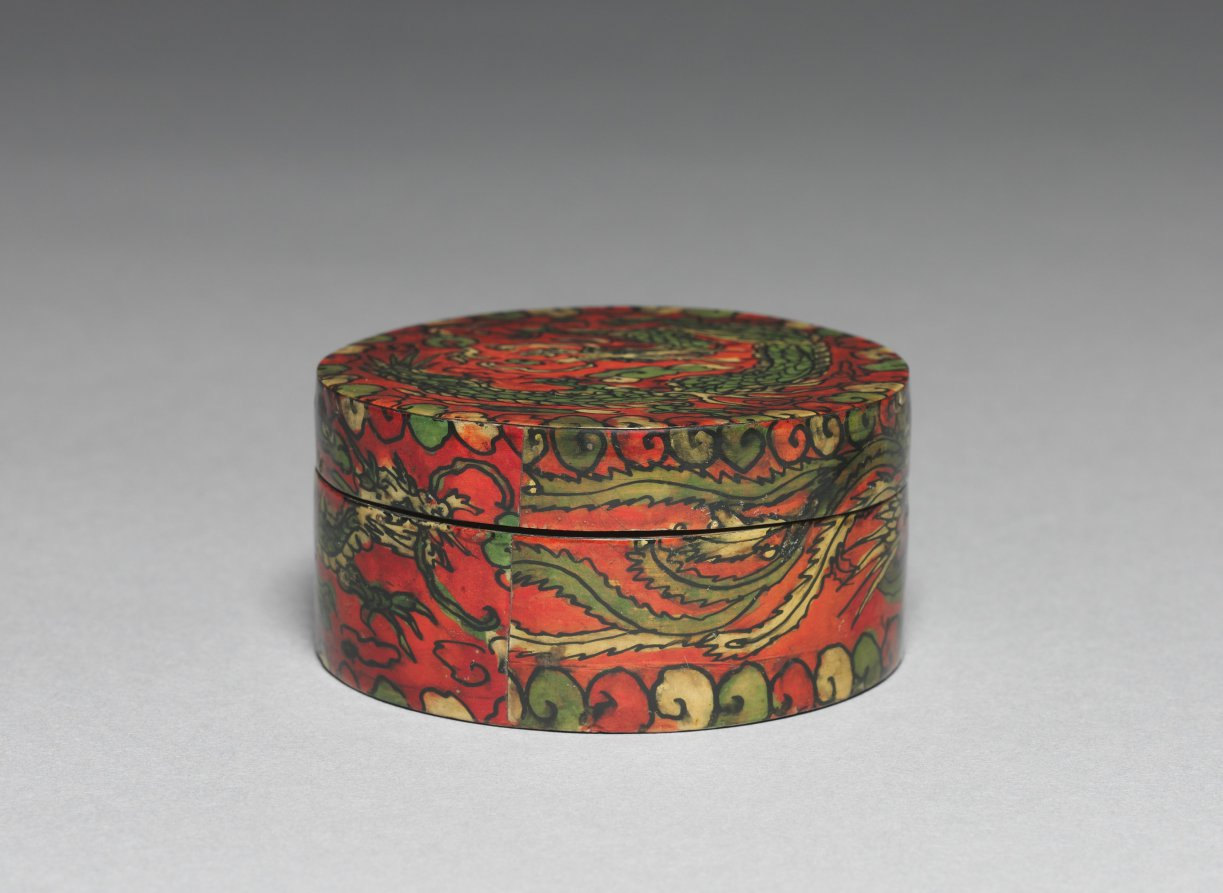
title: Incense Box with Dragon Design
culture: Korea, Joseon dynasty (1392–1910)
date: 1900s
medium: Painted wood with flattened ox-horn inlay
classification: Miscellaneous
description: This incense box is colorfully decorated with the technique of oxhorn plating. The oxhorn was cut, soaked in water, boiled, and then pressed into thin translucent sheets. Since oxhorns are usually rather small, dozens of them were required to fully decorate even a small wooden object. The lid of this container is colorfully illustrated with the imagery of a dragon amid clouds deemed as an auspicious symbol, and its side presents flying dragon and phoenix following one after another.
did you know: This box is made of small flattened pieces of oxhorn. Since oxhorn is rather small, possibly dozens of them were used to fully decorate even a small wooden object like this box.